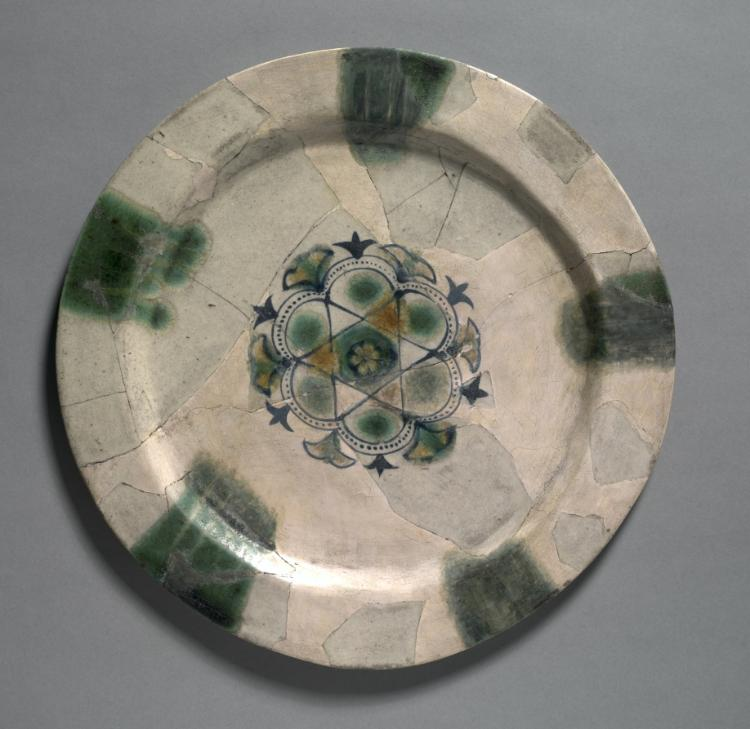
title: Dish with Splashes of Green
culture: Iraq, Basra, Abbasid period (750–1258)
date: 830–900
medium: Earthenware with overglaze design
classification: Ceramic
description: This dish displays two great technological advances of the 800s: the invention of opaque white glaze made with tin (imitating Chinese porcelain) and painting in cobalt blue. The blue paint was sometimes used to decorate the center of the bowl with floral and geometric designs, as seen here, or to write Arabic inscriptions offering blessings and well wishes. The green splashes around the rim reflect a popular color choice at the time. The splash effect was made by placing green glaze at the edge of the rim and then allowing it to run toward the center of the dish.